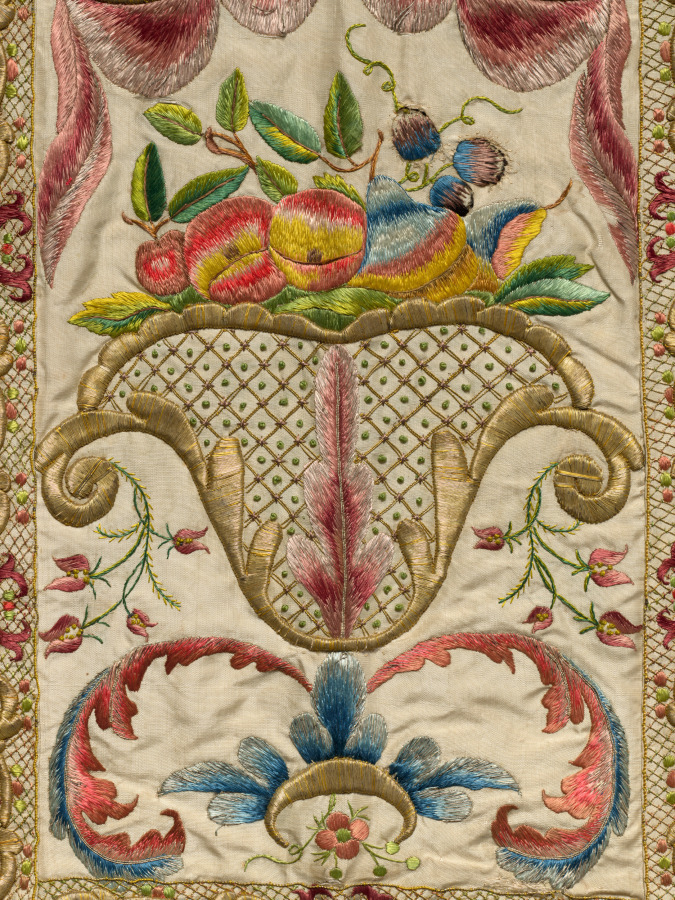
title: Chasuble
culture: Italy or Spain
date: 1700s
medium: Silk and metallic threads: embroidery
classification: Embroidery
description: The chasuble’s exquisite symmetrical decoration highlights its central panel where three illusionary gold containers hold skillfully shaded fruit in pastel silk tones. Delicately curving motifs enhance the side panels along with finely stitched strawberries in so-called French knots. This liturgical chasuble and other vestments, worn over a white alb with lace, were embroidered by professional specialists, such as experts who shaded colored silks or secured gold thread, in early versions of assembly lines that were usually in secular workrooms or in convents. The church or commissioner supplied the raw materials and paid a fee for the work.